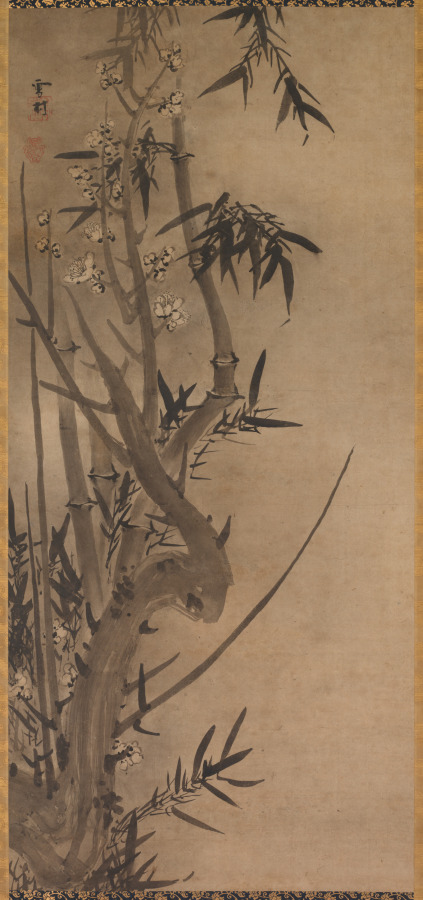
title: Bamboo and Plum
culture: Japan, Muromachi period (1392–1573)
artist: Sesson Shūkei (Japanese, active 1504-c. 1589)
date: 1500s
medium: hanging scroll; ink on paper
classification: Painting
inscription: signed: "Sesson"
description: This painting of a white plum (or prunus) and bamboo was once part of a triptych. A central image of the demon-queller Zhong Kui was flanked by this painting and one of a red plum and bamboo. The paintings would have been suitable to hang after the turn of the new year, when Zhong Kui would drive out evil demons, and the year’s first flowers were in bloom. Sesson hailed from what is now Ibaraki prefecture in northern Honshu. A Zen monk, he spent much of his career in the Kanto region, and developed a distinctive style uninhibited by formal training in the Kano atelier.